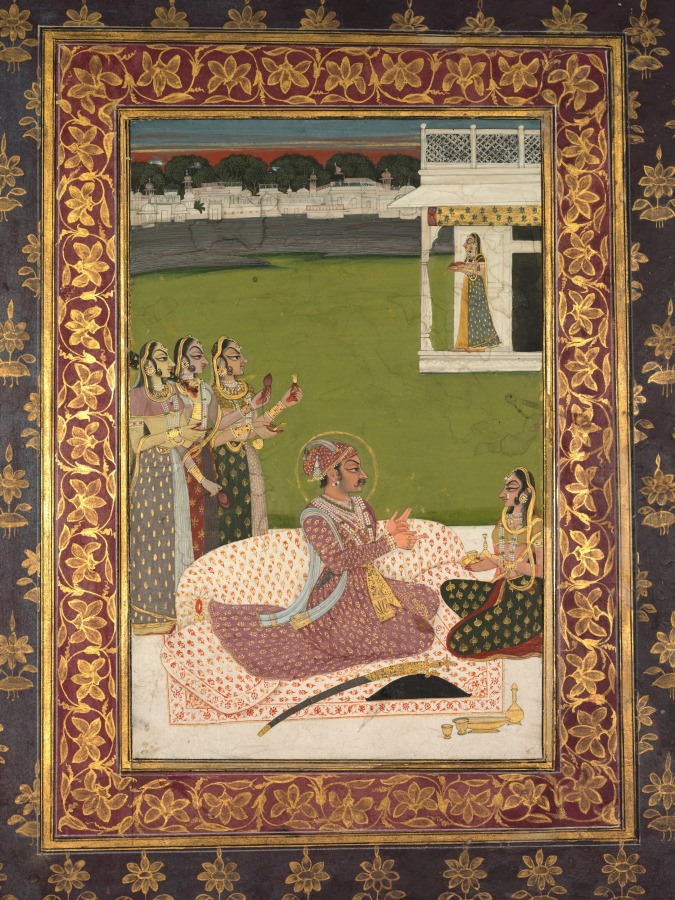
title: Portrait of Maharaja Savant Singh with Consort, Bani Thani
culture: India, Rajasthan, Kishangarh school, possibly Savant Singh reign (1748-1757)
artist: attributed to Nihal Chand (Indian)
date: mid-1700s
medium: Gum tempera, ink, and gold on paper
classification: Painting